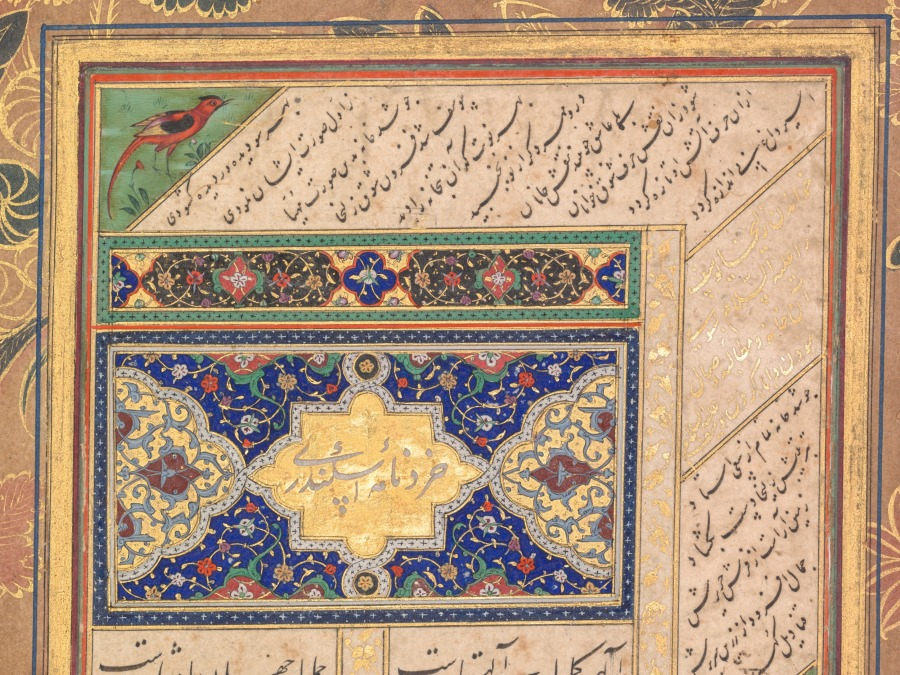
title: Illuminated page (verso), from a Panj Ganj (Five Treasures) of Abd al- Rahman Jami (Persian, 1414–1492) with two Persian masnavis: Yusuf va Zulaykha (Joseph and Zulaykha) and Khirad-nama-i Iskandari (Alexander’s Book of Wisdom)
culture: Western Afghanistan, Herat (text); Mughal India (paintings)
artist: Mushfiq (Indian, active early 1600s)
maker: Sultan 'Ali al-Mashadi (Iranian, 1430–1520)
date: 1603–7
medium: Gum tempera, ink, and gold on paper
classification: Painting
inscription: [[Persian title in gold, nasta’liq script]] Khirad-nama-I Iskandari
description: This section of text from Jami’s poem of Joseph and Zulaykha, written diagonally in the margins, describes the beauties of Zulaykha’s house, in which she intends to seduce Joseph. It includes the following verses: Jeweled lamps on the walls were hung / And odorous herbs were beneath them flung. / She gathered together all things most fair, / And unrolled the carpet of pleasure there. / But amid the charms of the sumptuous hall / She longed only for Joseph, far dearer than all. / A heavenly palace is dark and dim / To a lover whose darling is far from him. The longing of Zulaykha for Joseph metaphorically describes an imperfect devotee’s mystical love for God. With patience, forbearance, and virtuous actions, unification with the divine will eventually occur, even for the most flawed among us. On this page also begins the Khirad-nama-i Iskandari (Alexander’s Book of Wisdom), another of the five narrative poems that make up the Panj Ganj.